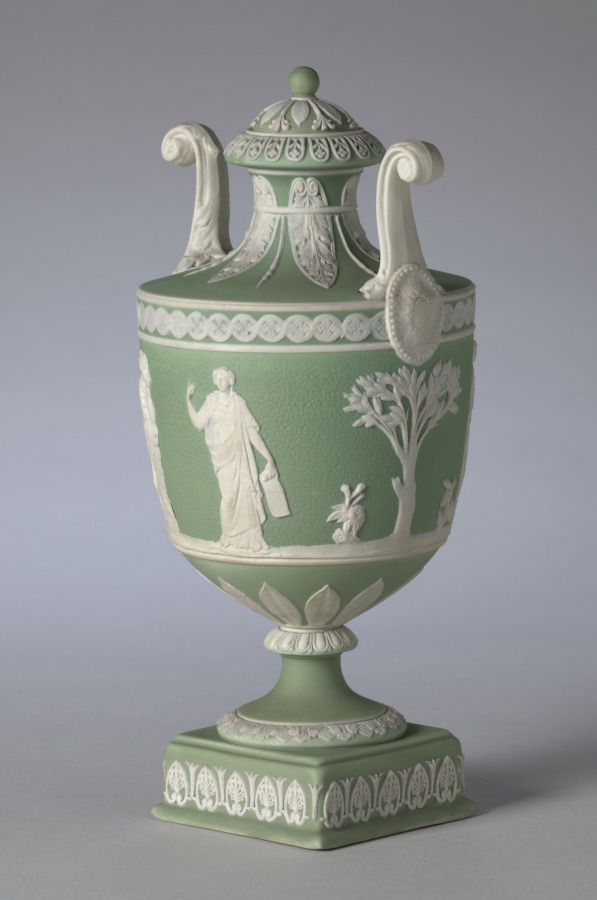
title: Covered Urn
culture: England, Staffordshire, late 18th-early 19th Century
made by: Wedgwood Factory (British)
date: c. 1800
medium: jasper ware with relief decoration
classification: Ceramic